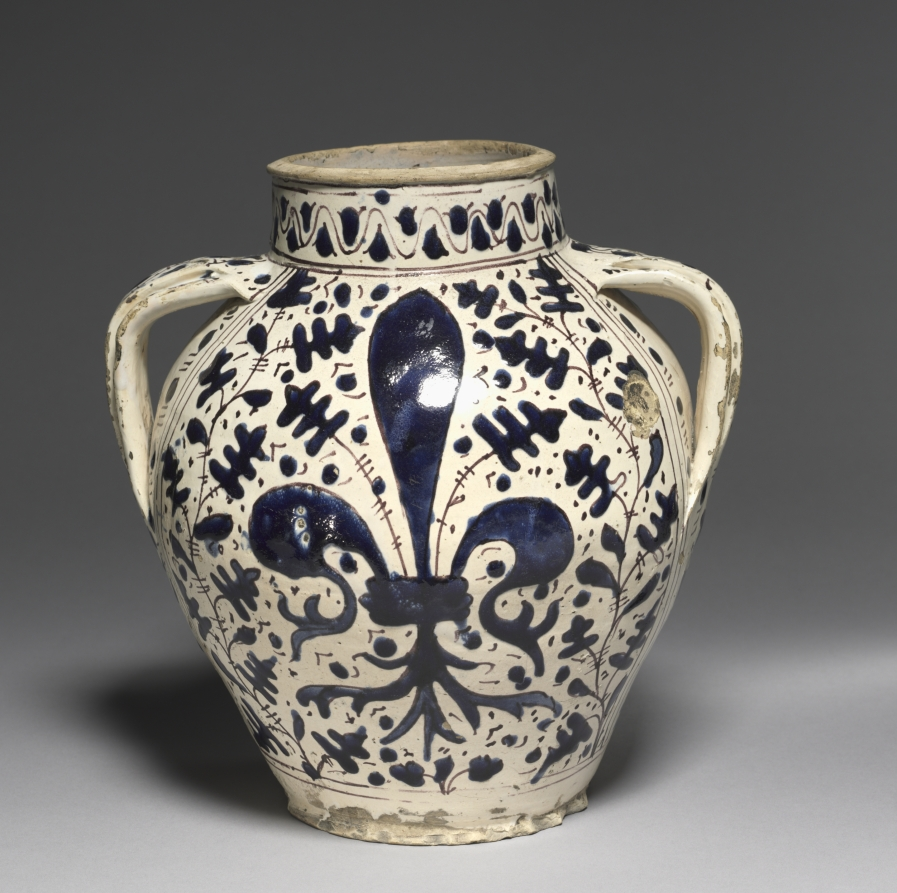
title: Two-Handled "Oak Leaf" Pharmacy Jar with Fleur-de-Lys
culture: Italy, Florence, 15th century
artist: workshop of Giunta di Tugio (Italian, c. 1382–1450)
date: c. 1430–1450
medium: tin-glazed earthenware (maiolica)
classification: Ceramic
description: Giunta di Tugio was the most important maiolica ceramist of his time in Florence. Di Tugio was trained in his father's workshop, which he took over following his father's death around 1419, managing it for the next thirty years. According to documents, by 1417 di Tugio was a member of the council of oliandoli, or oil merchants.